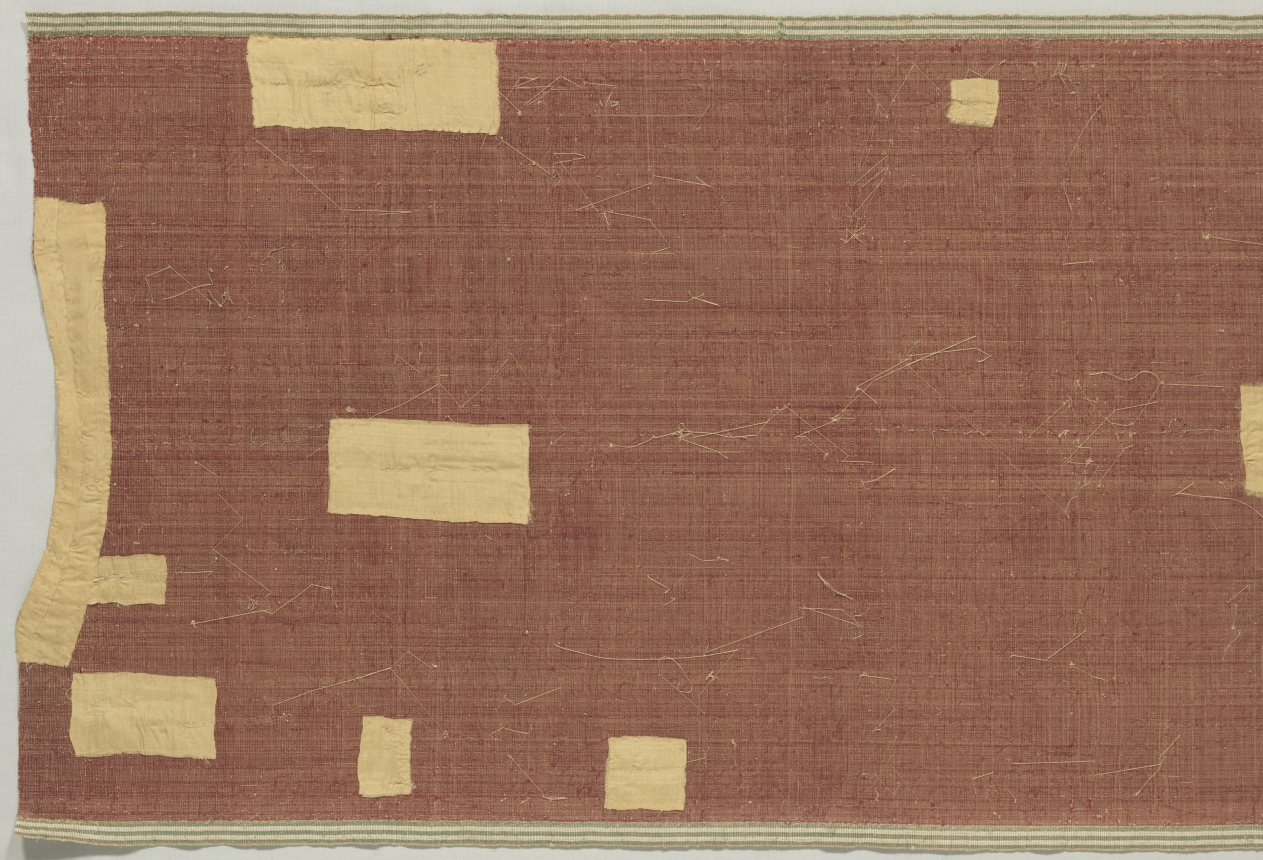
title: Silk Velvet with Gold in Pomegranate Pattern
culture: Italy, possibly Florence, 15th century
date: 1450–1500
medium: silk, gold thread; velvet: cut pile in two heights, uncut pile loops, gold-thread loops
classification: Velvet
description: Luxurious silk velvets with expensive gold thread were symbols of wealth and power. The finest velvets during the 1400s have two, or even three, heights of lush projecting pile. This fashionably large pomegranate pattern features exorbitant gold-thread loops enriching the lower level and a plain higher level. The curved upper and lower contours suggest this was the back of a sleeveless ecclesiastical vestment known as a chasuble. The striped green and ivory selvage was the equivalent of a label, required by law. It identified the fiber content, its quality, and quantity, which determined the price. Selling prices reflected the costs of the raw materials—gold thread, silk, and dyestuffs. Compensation for artisans was generally minimal.